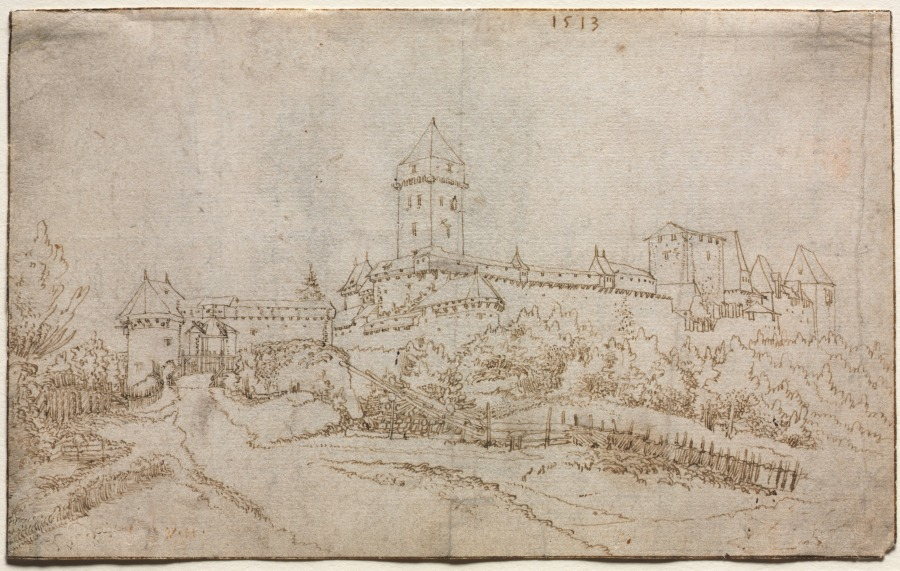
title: View of a Castle (recto); Eight-Sided Cup (verso)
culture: Austria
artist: Wolfgang Huber (Austrian, 1490–1553)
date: 1513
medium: pen and brown ink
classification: Drawing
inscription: recto: upper center, in brown ink: 1513; lower left, in brown ink: v. h verso: by artist?, across entire sheet, in black ink: [Ov]iduss Beschribet gar schon / Von einem Cunig Akteon / Wie er aing malß wolt jagen thain / jagt hin und da jm Holtze / fand er ein Göttin Rein vnd stoltze / Diana / die padet mit jeren junkfrauen / die pegünnt er an zu schowen / Daß es sie ser verdross / sy in mit Wasser pegoss / Zw [illegible] Hirschen un wissent / daß jm sin eigen Hünt zeryssen / Daß er sich zum Hirschen verkert / von seinen Hunden zerrissen zu d[illegible] / Erd [sideways]; upper center, in red chalk: [illegible, crossed out] / adltof.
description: This drawing depicts a castle in southern Germany in the area around the Danube River known for its wooded and rocky heights and dramatic views. Wolfgang Huber's meandering, pen and ink lines describe the contours of the earth and the lushness of summer foliage in a horizontal layout that focuses on the middle distance with a barely recorded foreground. Huber may have made the drawing during a journey between Feldkirch and Vienna as he traveled along the Danube. In 1513 when this drawing was made, landscape was rarely depicted as a subject in and of itself, but artists in the Danube region such as Huber exhibited a profound sensitivity to nature. A drawing on the reverse of the sheet depicts a cup studded with gems and a poem written in a contemporary hand telling the mythological story of Actaeon's transformation into a stag when he intruded upon the goddess Diana and her nymphs bathing.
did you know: This sheet of paper, with drawings on both sides, as well as a poem, shows how artists in the Renaissance often used one sheet of paper for various purposes.